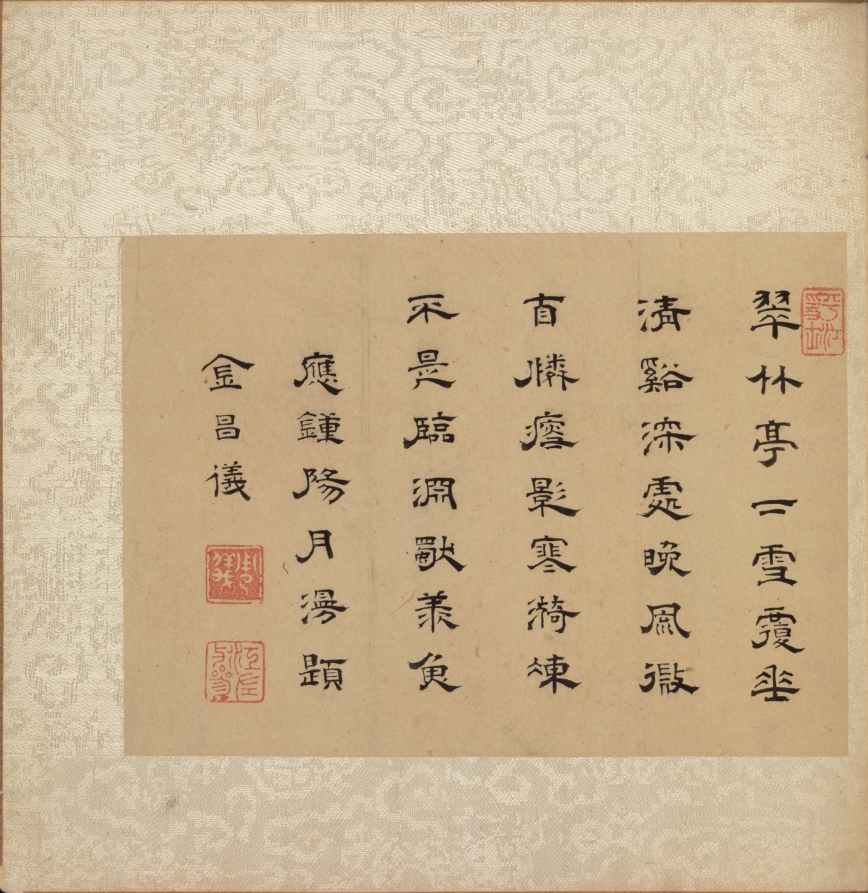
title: Album of Miscellaneous Subjects, Leaf 10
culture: China, Qing dynasty (1644-1911)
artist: Fan Qi (Chinese, 1616–after 1694)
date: early 1650s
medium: album leaf, ink and color on silk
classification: Painting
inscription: Artist's signature: Zhongling Fan Qi 鐘陵樊圻 ["Fan Qi of Zhongling" (Zhongling is another name for Nanjing.)]. Artist's seals: Fan Qi 樊圻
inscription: Poem by Zhou Yi 周儀 (mid 17th century–about 1705): Green bamboo stand alone with a snowy covering,/ In the deep recesses of a secluded valley, the evening breeze is light./ White egrets are lean as shadows with the cold ripples frozen,/ They enter the gorge not just to admire the fish.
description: Leaf 10 Zhou Yi's colophon reads: Green bamboos stand alone with a snowy covering, In the deep recesses of a secluded valley, the evening breeze is light. White egrets are lean as shadows with the cold ripples frozen, They enter the gorge not just to admire the fish.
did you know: Icicles encase the leaves and red berries of the Nandina domestica (Heavenly Bamboo).